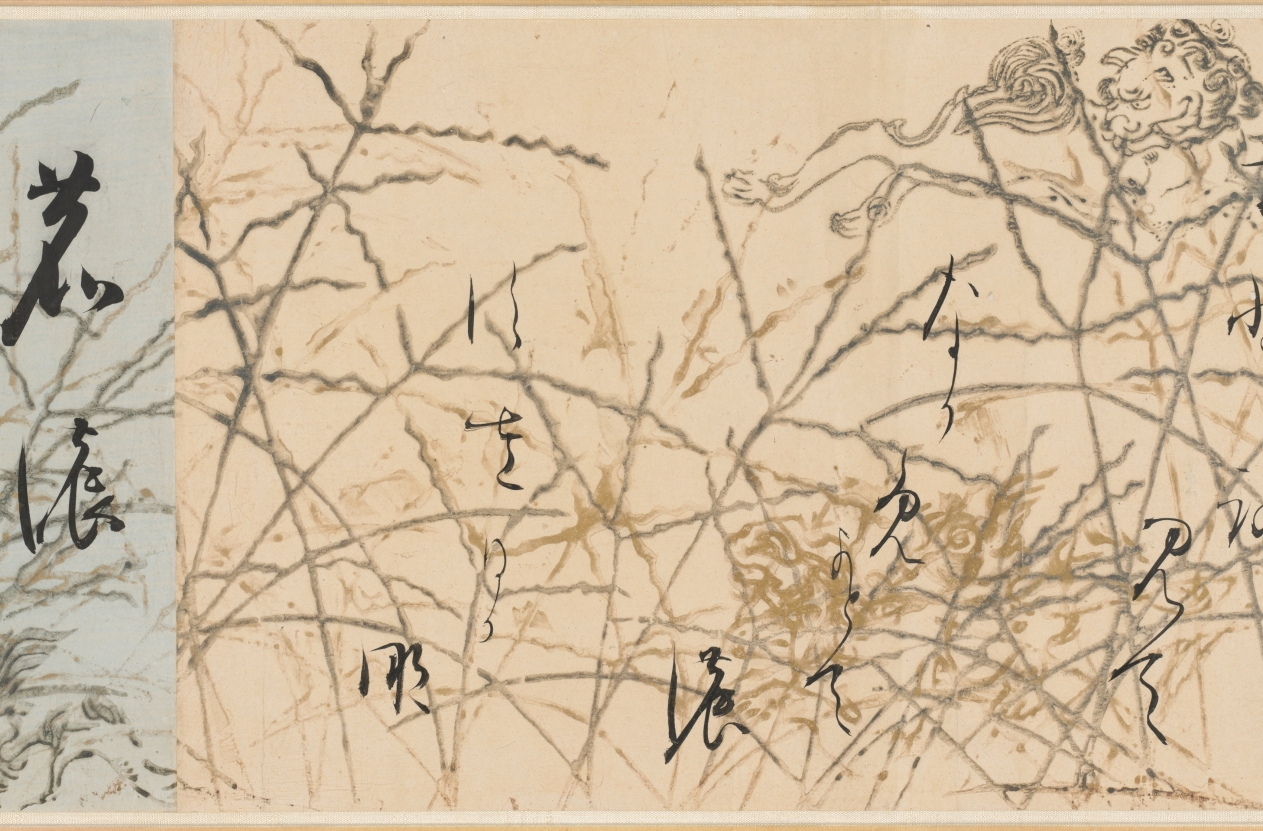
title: Selections from the New Collection of Japanese Poems from Ancient and Modern Times (Shinkokin wakashū) with Printed Designs of Chinese Lions and Crab Finger Grass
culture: Japan, Edo period (1615–1868)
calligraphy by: Hon'ami Kōetsu (Japanese, 1558–1637)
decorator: Tawaraya Sōtatsu (Japanese, c. 1570–c. 1640)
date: early 1600s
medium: handscroll; ink, gold, and silver on paper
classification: Calligraphy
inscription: Seal: 光悦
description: Hon’ami Kōetsu was a calligrapher and craftsman who frequently collaborated with the painter Tawaraya Sōtatsu, considered the first master of the Rinpa school. Kōetsu brushed seven poems from the autumn section of a poetry anthology onto dyed paper with motifs designed and printed in gold and silver by Sōtatsu.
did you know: Before becoming a master painter of screens, Tawaraya Sōtatsu painted fans.